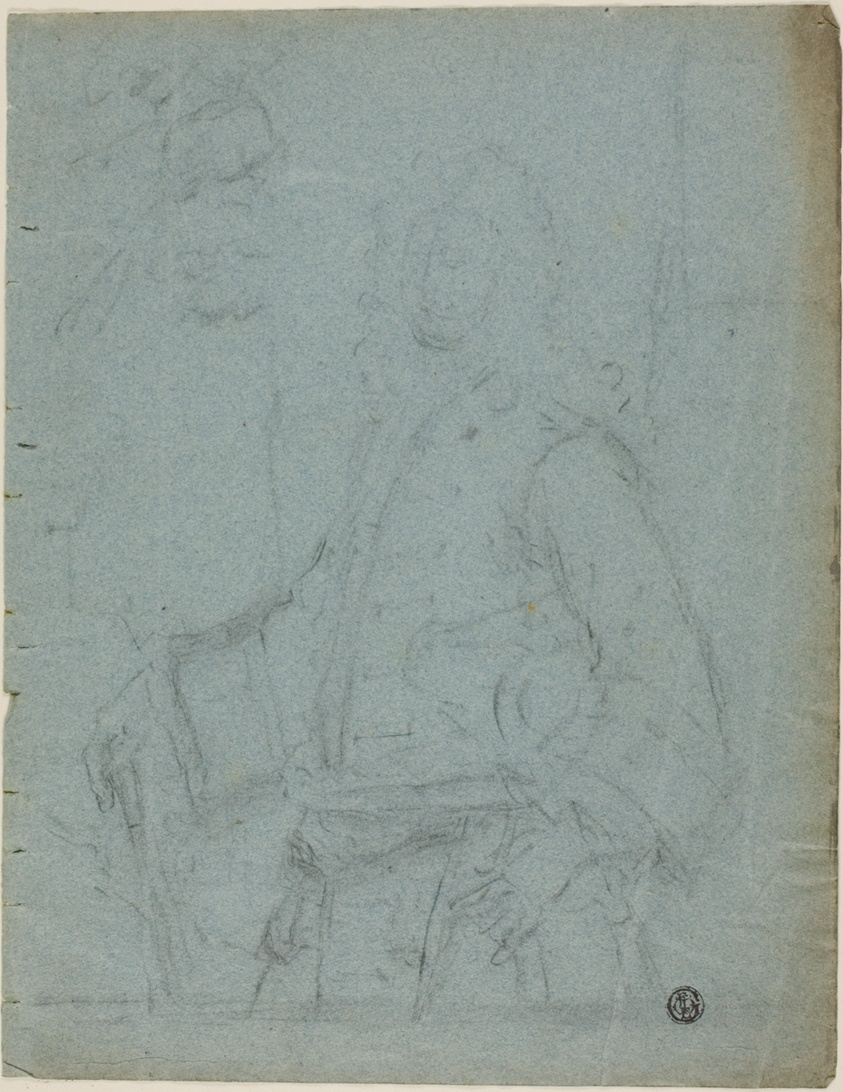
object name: Drawing and Watercolor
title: Portrait of a Man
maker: Possibly William Hoare (English, c. 1707-1792); or Godfrey Kneller (English, born Germany, 1646-1723); or Charles Jervas (Irish, c. 1675-1739)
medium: Black chalk, with touches of white chalk, on blue laid paper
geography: England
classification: chalk; drawings (visual works); prints and drawing